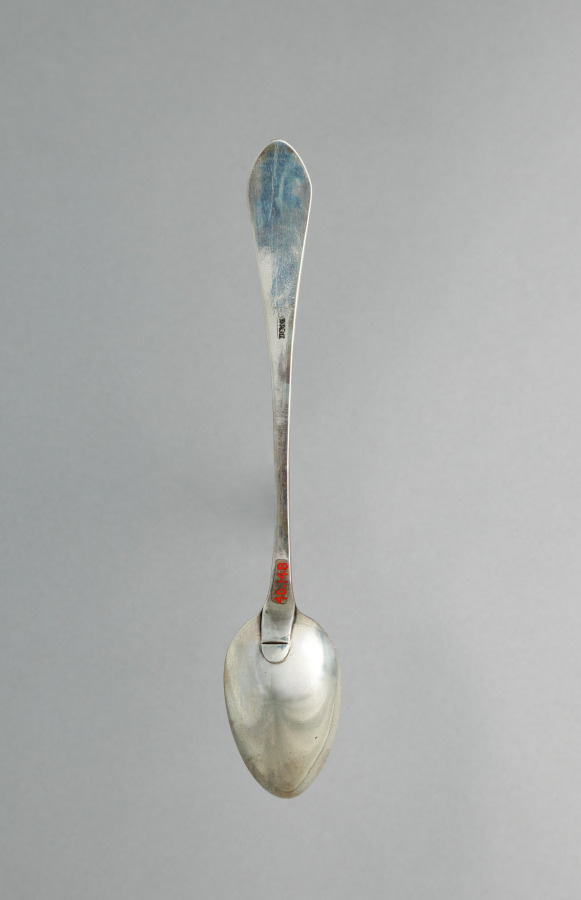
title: Spoon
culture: America, Massachusetts, 18th century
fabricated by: Caleb Beal (American, 1746–1801)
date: c. 1790–1800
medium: silver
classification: Silver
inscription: "HAB" in script within reserve on top at handle end. (Initials of the original owner have not been identified.)